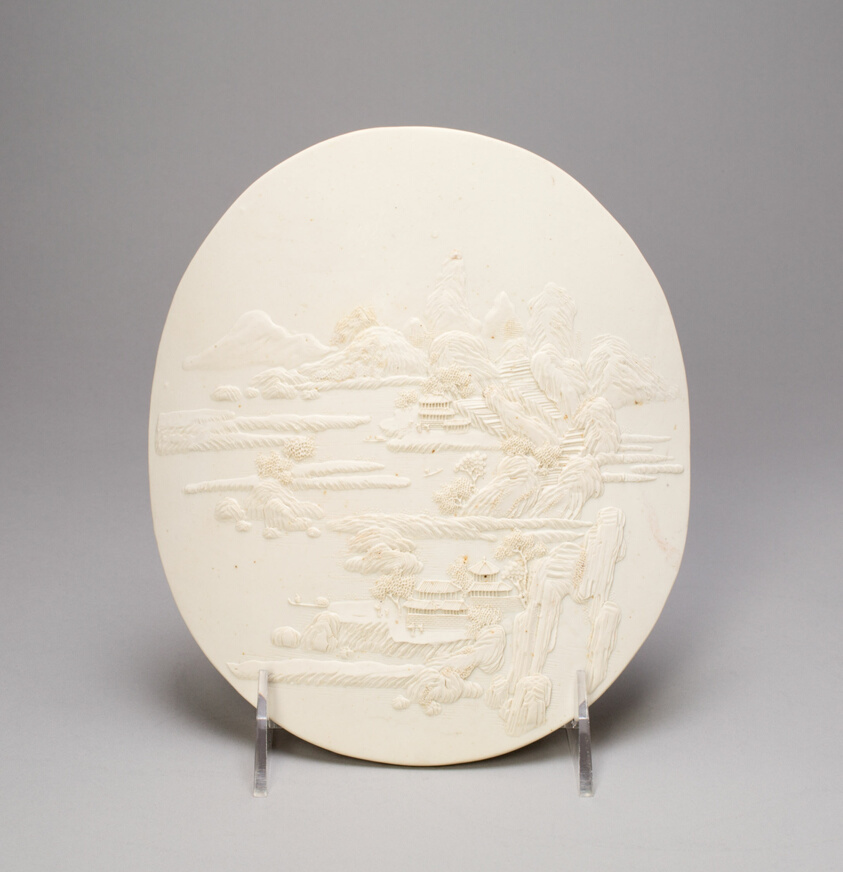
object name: Sculpture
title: Oval Plaque with Landscape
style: Chinese (culture or style)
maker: China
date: Qing dynasty (1644–1911), 18th century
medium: Porcelain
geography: China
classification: porcelain; ceramics; asian art; sculpture